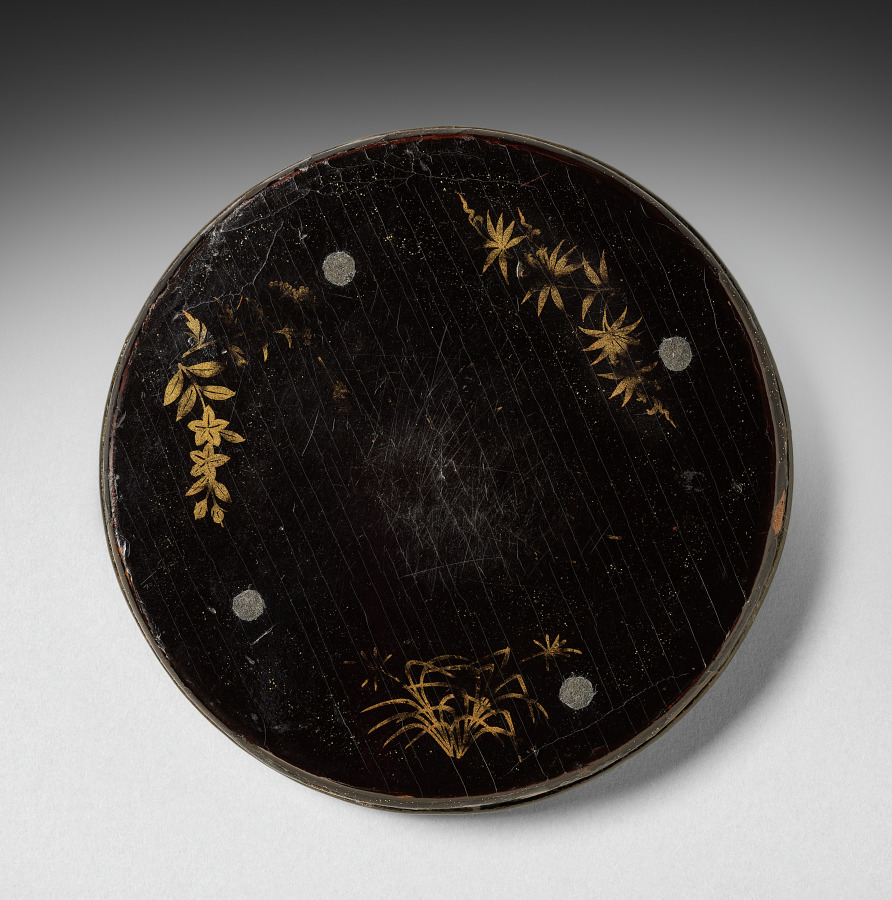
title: Mirror Container with Design of Maple Tree and Autumn Shower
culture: Japan, Muromachi period (1392–1573)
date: 1400s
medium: lacquer on wood with decoration in maki-e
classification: Lacquer